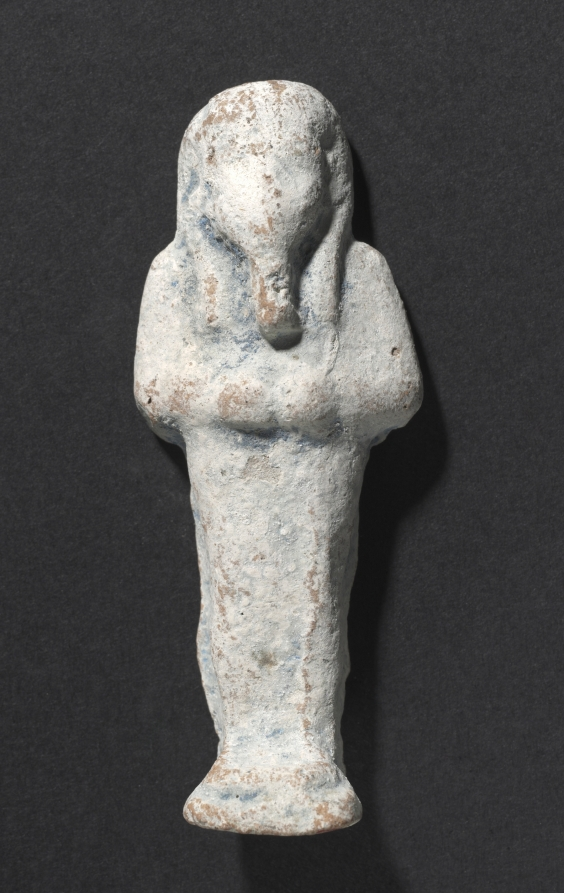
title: Shawabty of Ditamenpaankh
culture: Egypt, Late period (715–332 BCE), Dynasty 25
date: 715–656 BCE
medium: terracotta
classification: Funerary Equipment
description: High demand for shawabtys in the Late Period, a time when as many as 400 or more shawabtys were placed in the tomb with the deceased, gave rise to a specialized container for storing them: the shawabty box. This example is inscribed for the lady of the house, Ditamenpaankh, and was probably one of a pair originally made for her. The single-masted boat on the box's lid is perhaps an allusion to the pilgrimage of the deceased to the holy city of Abydos, the cult city of Osiris, king of the dead. The shawabtys inside are crude, mass-produced examples cast in an open mold. Made of terracotta, their blue paint imitates more costly shawabtys made of faience. As for the shawabty spell, it has been removed from its traditional location on the shawabty's front and relocated onto the sides of box, where it needed only to be written once, thus expediting production.